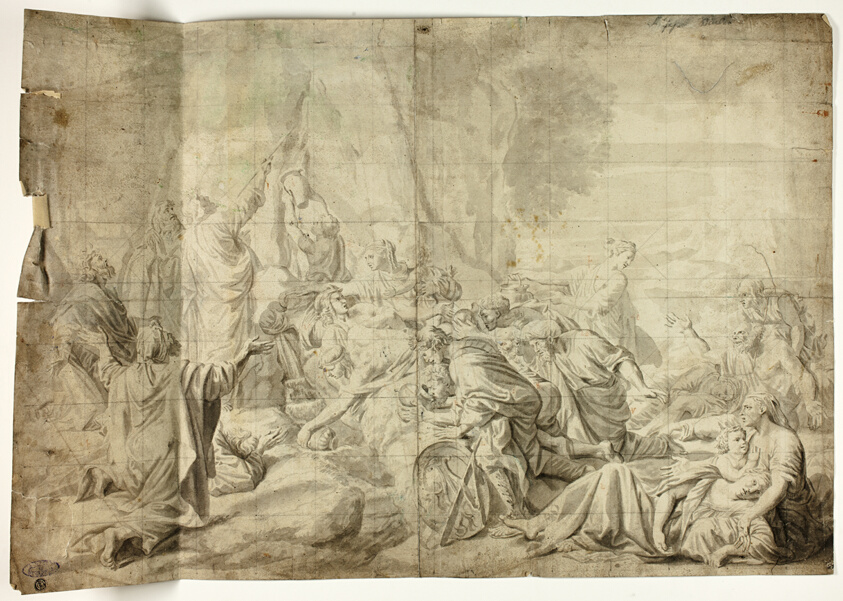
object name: Drawing and Watercolor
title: Moses Drawing Water from the Rock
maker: Possibly after Charles Le Brun (French, 1619-1690); or after Nicolas Poussin (French, 1594-1665)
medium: Brush and gray wash, with touches of green and black chalk, on ivory laid paper, squared in black chalk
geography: France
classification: ink or chalk wash; drawings (visual works); prints and drawing; brush and wash; paper